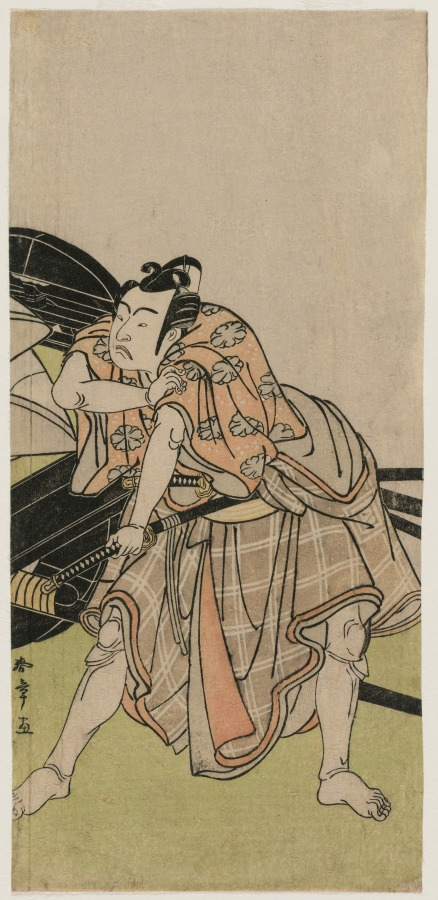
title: Ichikawa Yaozo II as Sakuramaru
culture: Japan, Edo period (1615–1868)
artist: Katsukawa Shunshō (Japanese, 1726–1792)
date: 1776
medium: color woodblock print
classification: Print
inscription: Signature: Shunsho ga